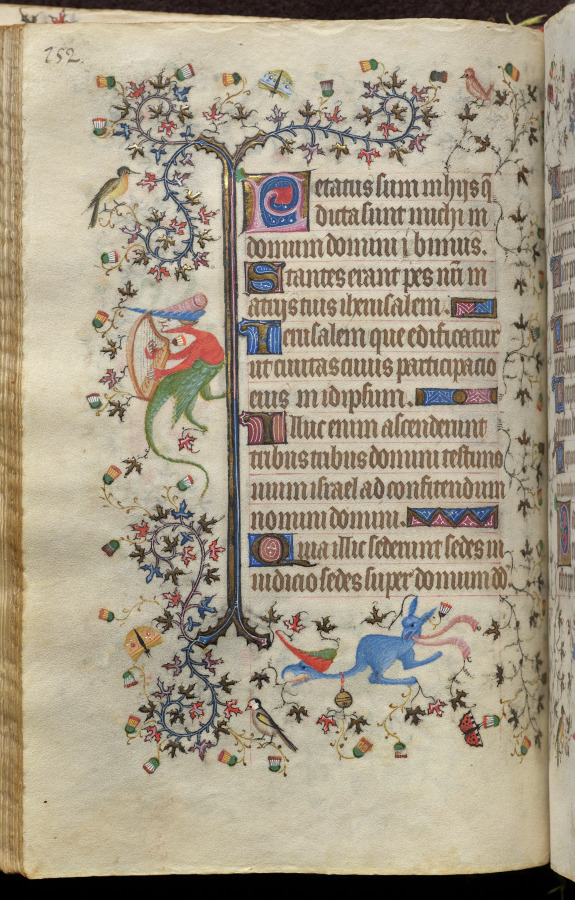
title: Hours of Charles the Noble, King of Navarre (1361-1425): fol. 76v, Text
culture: France, Paris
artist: Master of the Brussels Initials and Associates (French)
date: c. 1405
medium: ink, tempera, and gold on vellum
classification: Bound Volume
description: This precious volume was obviously highly prized by its owner, the French-born King of Navarre, who had his coat of arms painted on no less than twenty folios. Rather than directly commissioning this manuscript from a specific workshop, it seems that Charles the Noble acquired his book of hours -- perhaps ready-made for the luxury market -- while on a trip to Paris in 1404-05. A collaborative effort, six painting styles are evidenced within the pages of this codex, those of two Italians, two Frenchmen, and two Netherlanders. The painter who was responsible for the planning and decoration of the book, and who produced seventeen of the large miniatures, was a Bolognese artist known as the Master of the Brussels Initials. His principal assistant, responsible for most of the borders, was a Florentine who signed his name "Zecho" da Firenze on folio 208 verso.